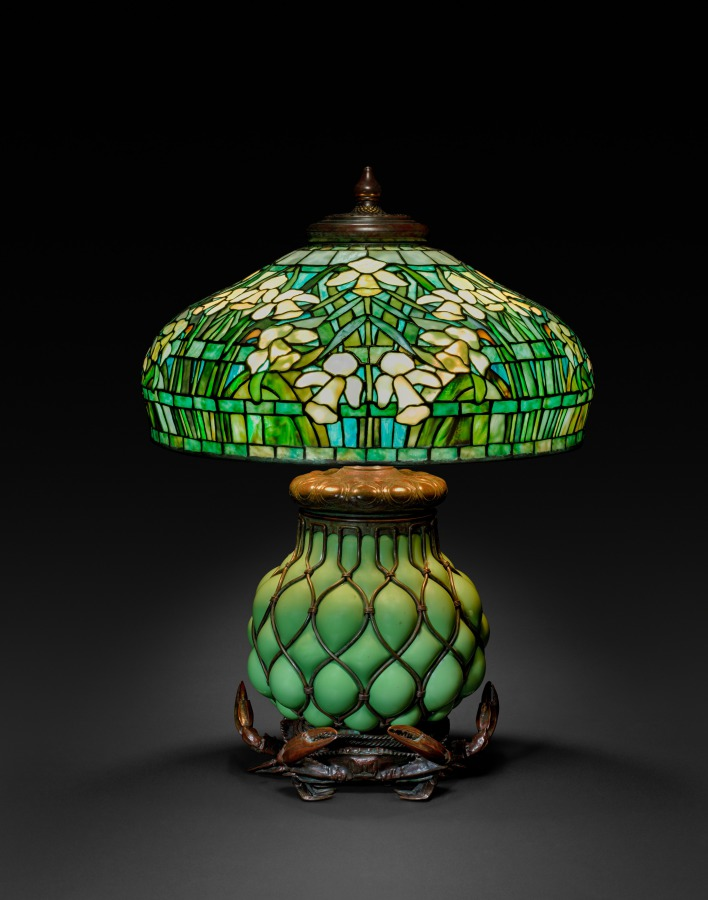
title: Daffodil Table Lamp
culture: America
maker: Tiffany Studios (United States, New York, 1902–32)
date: c. 1910–13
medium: Leaded glass, blown glass, bronze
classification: Lamp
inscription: TIFFANY STUDIOS NEW YORK 3171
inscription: TIFFANY STUDIOS/NEW YORK/25922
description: In the 1870s a renewed emphasis on natural landscapes ushered in a generation of cottage gardeners who delighted in planting perennials in large quantities. Louis Comfort Tiffany was among those who championed the lush, sometimes wild-looking displays of varied floral species in the garden at his Long Island estate, Laurelton Hall. Tiffany encouraged his designers to take inspiration from his garden by shipping fresh cuttings almost weekly to his studios. Ohio native Clara Wolcott Driscoll and her team of female designers created floral patterns for lamps and mosaics based on the colorful blooms of spring that became among the most sought after and commercially successful of Tiffany’s production.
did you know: Giant bronze crabs, likely cast from a real crustacean, set the scene for this rare Tiffany Studios base in which green glass is blown into a bronze cage—a very difficult technique since glass and bronze cool at different temperatures risking a complete shatter if not executed correctly.